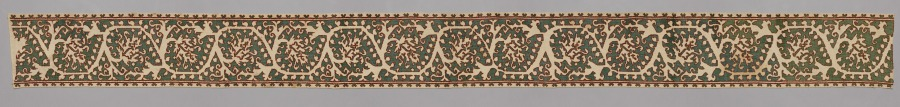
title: Embroidered Strip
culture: Italy, 17th century (copy of)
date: before 1916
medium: Linen: silk and gold filé, embroidery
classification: Embroidery